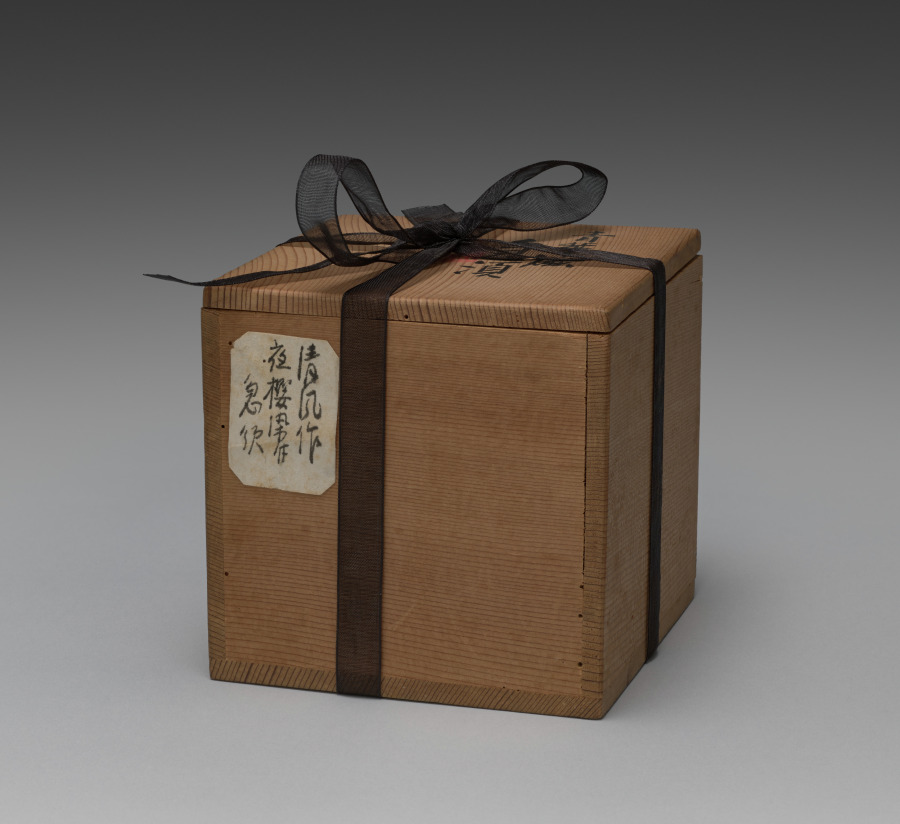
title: Teapot with Cherry at Night in Gion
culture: Japan, Meiji period (1868–1912)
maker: Seifū Yohei III (Japanese, 1851–1914)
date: 1893–1914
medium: Porcelain with underglaze blue and iron oxide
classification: Ceramic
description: This side-handled sencha teapot with the cherry tree has a nearly spherical shape, and its recessed lid has an ovoid knob. It has both blue and a purplish brown under the glaze for the blossoms and embers on one side, and the vertical calligraphy identifies the tree as a cherry tree at night in the Gion area of Kyoto. To the right of the tree, smoke billows from a small lantern fire in a basket suspended on a post. In terms of collecting history, a paper inserted into the box of Teapot with Cherry at Night in Gion is of interest. It is a flyer for Yamamoto Shōseidō, a shop (no longer extant) that sold fine Kyoto ceramics in Osaka.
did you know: This teapot features the Japanese theme of a blossoming cherry tree in the Gion area of Kyoto in underglaze blue and brown.